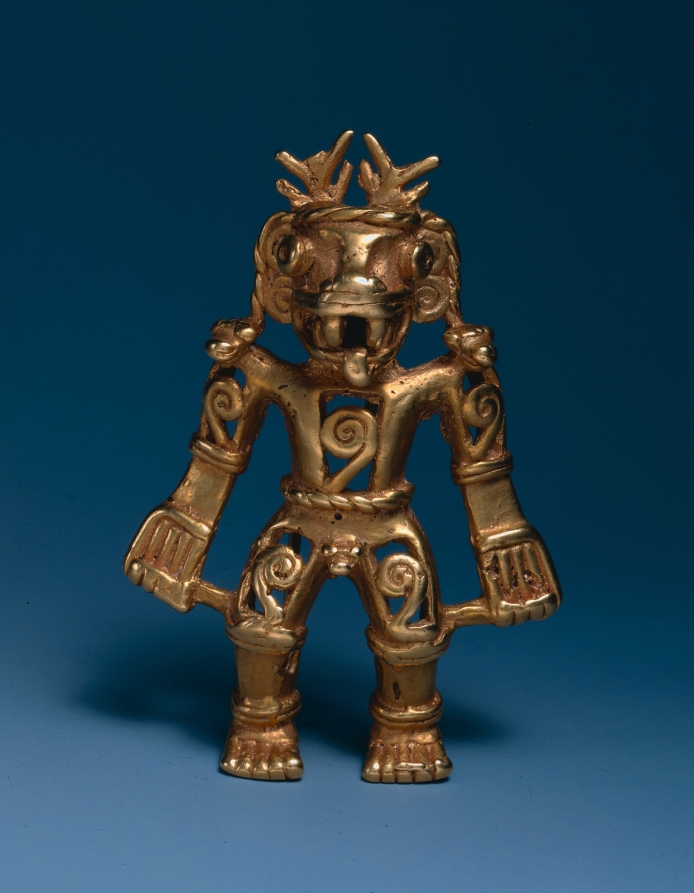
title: Figural Pendant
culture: Panama, Darién or Venado Beach region, Openwork style, 5th-8th Century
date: 400–700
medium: cast gold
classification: Metalwork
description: This emphatically male figure combines a human body with a composite animal head. The antlers are the stag's; the snout, perhaps a snarling feline's; and the hair is formed of braided serpents whose heads hiss from the figure's shoulders. The extended tongue may convey aggression or perhaps death because dying animals are depicted with lolling tongues. Either condition is in keeping with the creature's ferocity.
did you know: This ornament was made with the lost-wax casting technique.